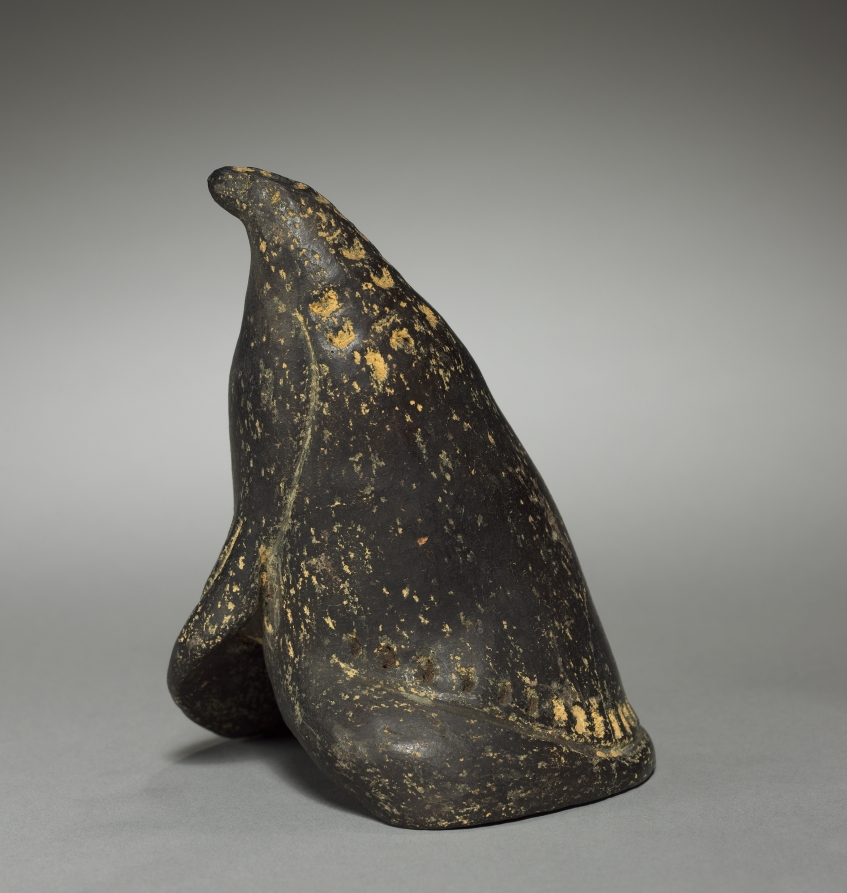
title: Ornament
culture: Colombia, 19th-20th century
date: before 1921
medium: black ware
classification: Ceramic